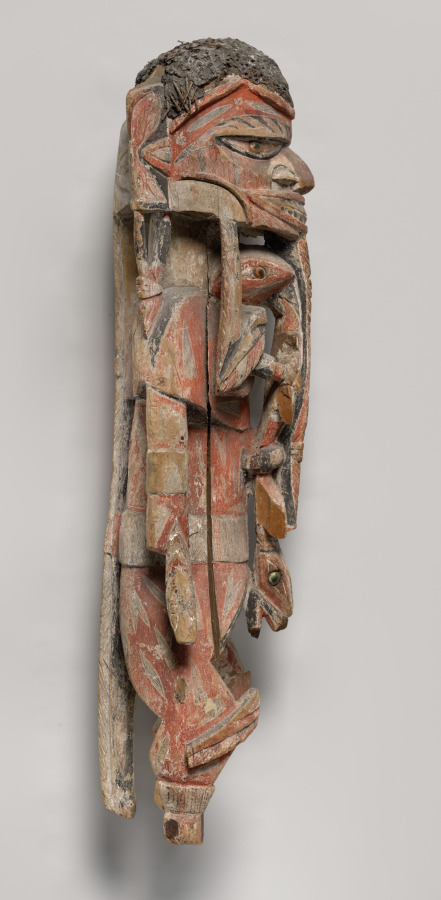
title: Malagan Memorial Festival Pole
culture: Melanesia, New Ireland, 19th century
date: 1800s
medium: painted wood, sea snail opercula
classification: Sculpture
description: At the death of an important individual in New Ireland society, villagers begin preparations for an elaborate funeral (malagan) ceremony. Food is collected for feasts, and artists are commissioned to carve elaborate sculptures and masks. Neighboring groups are invited to the ceremonies, which last for days and include speeches, dancing, music, feasts, and exchanges of goods. The ceremonies climax in the display of the elaborately carved, brightly painted art works. After the guests' departure, the malagan sculptures and masks are discarded, or sometimes stored.